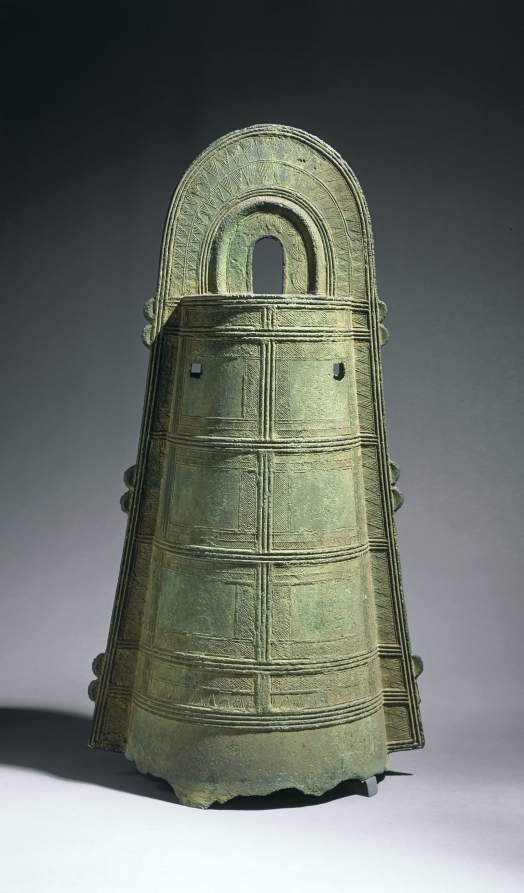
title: Dōtaku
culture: Japan, Yayoi period (c. 300 BCE–300 CE)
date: 100–200 CE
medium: cast bronze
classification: Metalwork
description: The flow of new peoples from Korea to Japan during the Yayoi period brought new technologies of bronze and iron casting. Similarly, the form of the dōtaku, or bronze bell, is thought to have originated in Korea. The original Korean prototypes—stout, thickly cast bells—were transformed in Japan into sculptural forms with sophisticated surface decoration. These dōtaku are often uncovered near burial sites paired with a metal spear or sword nearby, suggesting ceremonial importance.